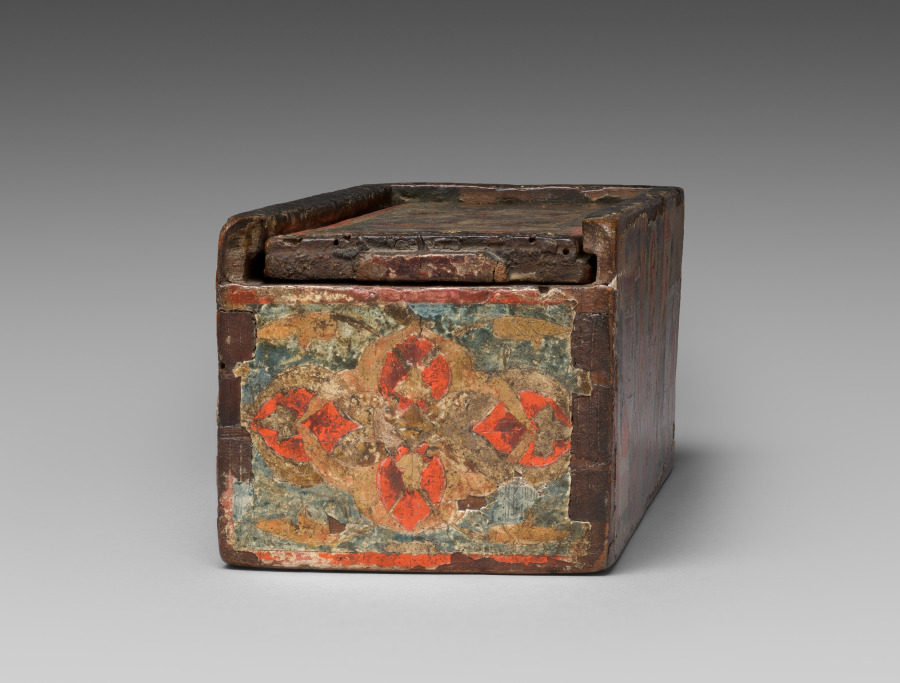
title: Reliquary Box with Scenes from the Life of John the Baptist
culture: Byzantium, Constantinople, late Byzantine period, 14th century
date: 1300s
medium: tempera and gold on wood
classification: Wood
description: John the Baptist--the first person to recognize Christ as the promised savior and the one who baptized him in the Jordan River--was one of the Byzantine Empire’s most revered saints. This box shows four scenes from the saint’s life: John’s martyrdom, Christ’s baptism, John’s birth, and the announcement of his birth to his parents. It probably once housed one of the saint’s relics; several were kept in churches and monasteries in Constantinople, including fragments of his skull and right arm and locks of his blood-clotted hair.